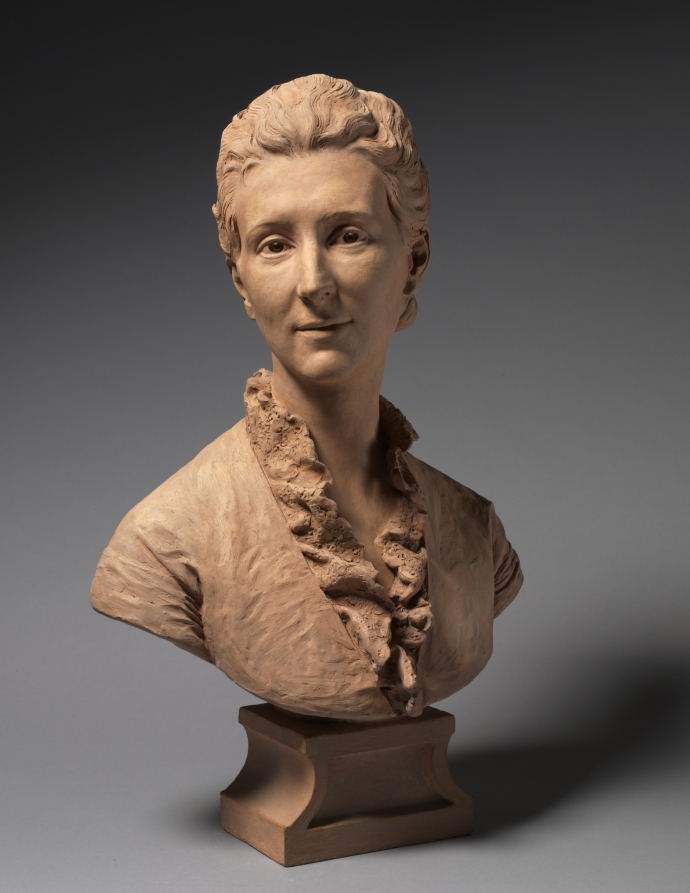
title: Bust of a Lady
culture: France, 19th century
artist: Jules Dalou (French, 1838–1902)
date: c. 1875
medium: terracotta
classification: Sculpture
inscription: Signed beneath right shoulder: "DALOU/1875"